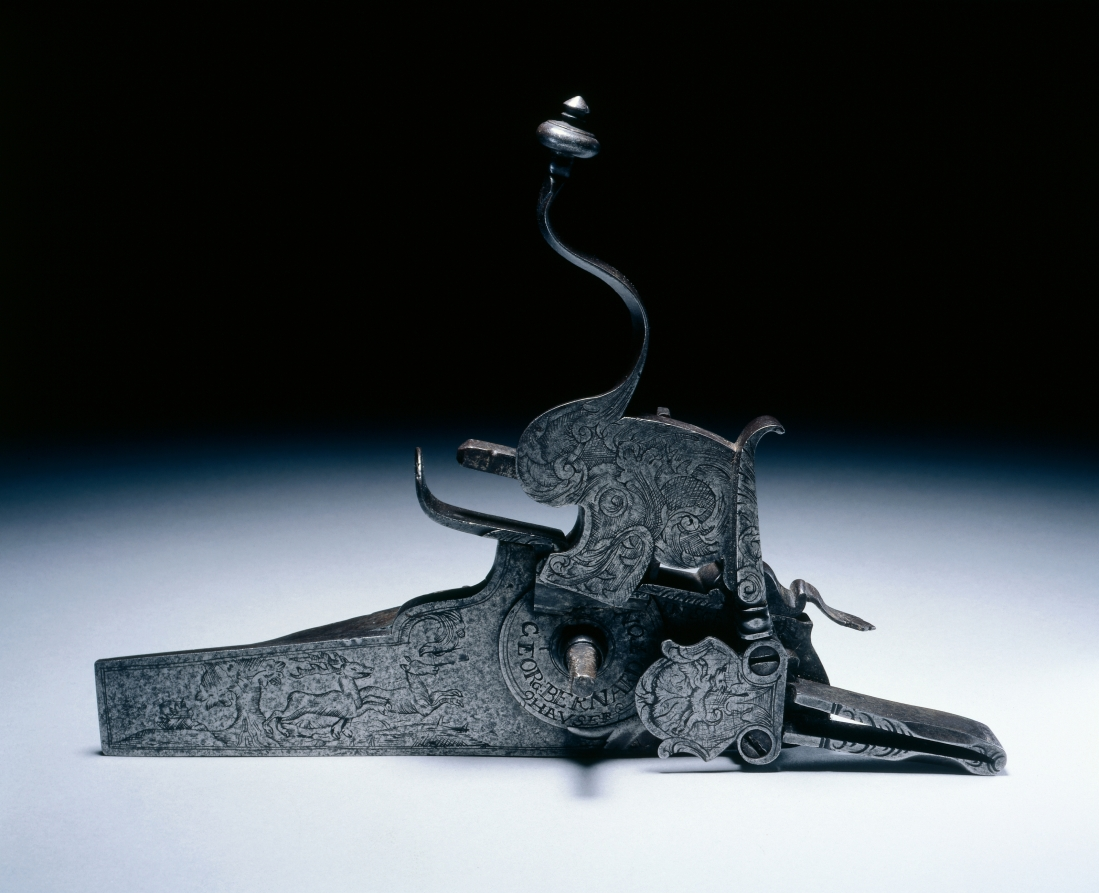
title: Wheel-Lock from a Hunting Gun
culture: Germany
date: 1600s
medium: steel, engraved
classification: Arms and Armor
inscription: on lock: Georg Bernardton Hauser; on plate behind hammer: In Schromn (?) Hauser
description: This wheel-lock mechanism is engraved with a stag and a hound. Images of "the chase" were obviously popular themes on weapons intended for hunting. The name of the locksmith, Georg Bernardton Hauser, can be seen on the wheel.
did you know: Engraving, one of the oldest techniques for decorating metal objects, was frequently used to embellish the metal parts of high quality firearms.